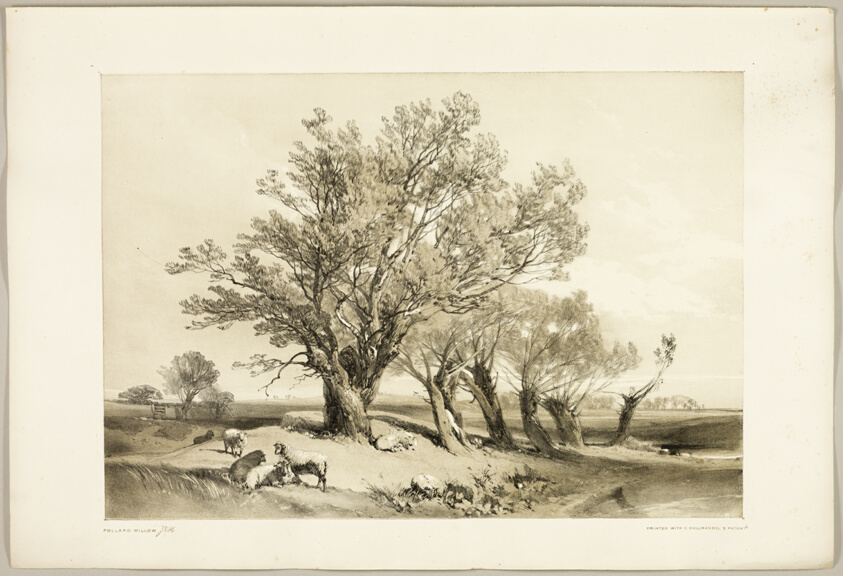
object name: Print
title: Pollard Willow, from The Park and the Forest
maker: James Duffield Harding (English, 1798-1863); printed by Charles Joseph Hullmandel (English, 1789–1850); published by Thomas McLean (English, 1788–1875)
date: 1841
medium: Lithograph in black, with brown tint from a second plate, on ivory wove paper, laid down on ivory wove paper (chine collé)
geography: England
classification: lithograph; print; prints and drawing